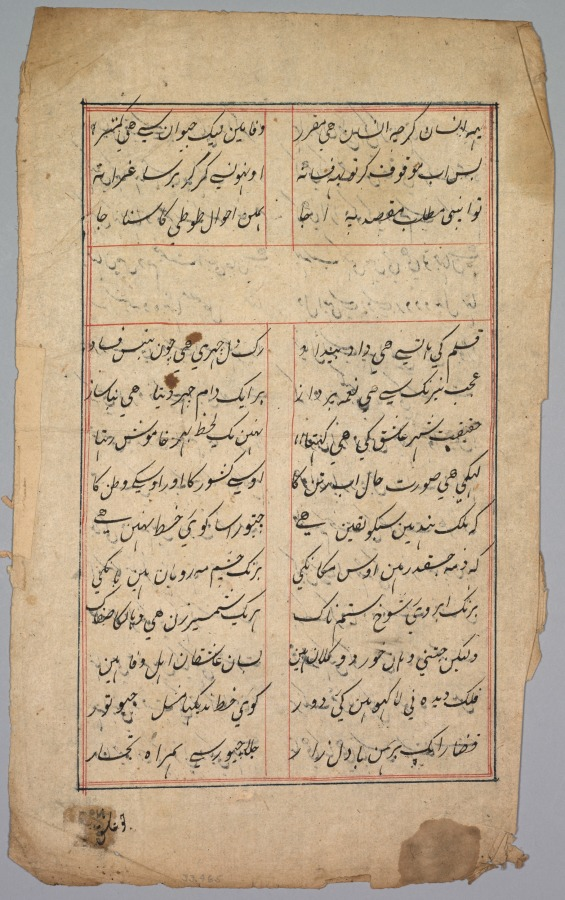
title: Page with Two Columns of Persian Writing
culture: India, Mughal Dynasty (1526-1756)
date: 18th century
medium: ink on paper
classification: Manuscript